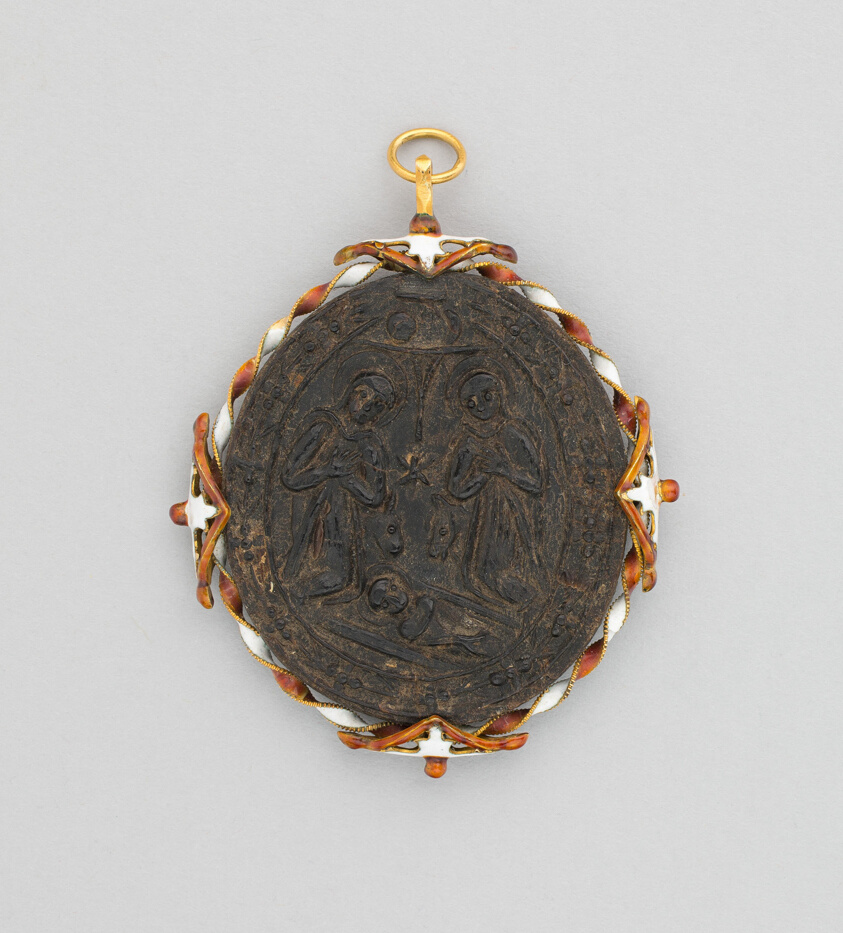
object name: Costume and Accessories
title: Two-Sided Pendant with Adoration and Baptism of Christ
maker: Spanish or Spanish Colonial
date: 18th century (?), mount: 19th century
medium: Enameled gold and jet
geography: Spain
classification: pendant (jewelry); jewelry; european decorative arts; costume